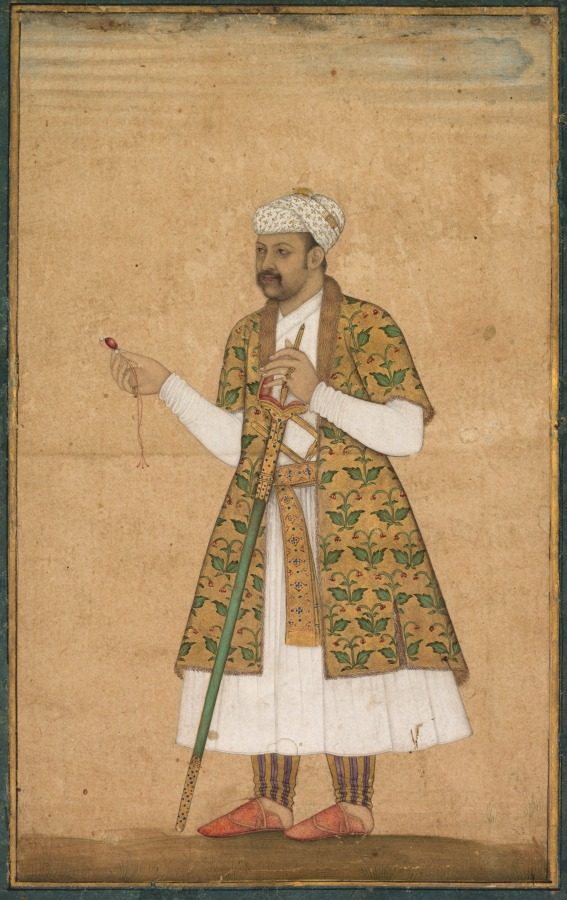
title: A Courtier, Possibly Khan Alam, Holding a Spinel and a Deccan Sword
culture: Mughal India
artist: attributed to Govardhan (Indian, active c.1596–1645)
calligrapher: Abd al-Rahim, the Anbarin-Qalam (Indian, active c. 1590–1630)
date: c. 1605–10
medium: gum tempera, ink, and gold on paper, text on verso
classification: Painting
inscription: Verso: A tahshiyya (marginal addendum) in rhymed prose from the Gulistan (Rose Garden) of Sa‘di (Persian, 1210–1291) and the Nafahat al-Uns (Breaths of Fellowship) of Abd al-Rahman Jami (Persian, 1414–1492), c. 1605, Abd al-Rahim, the Anbarin-Qalam (Indian, active c. 1590–1630), Mughal court; In nast’aliq script: O Lord of the all dominions Praise and thanks to God—may he be honored and glorified!—whose worship brings one closer to him and giving thanks [to him] increases his bounty. [Each breath] that one inhales, prolongs life, and when exhaled a rejuvenation of the soul. Thus each breath contains two blessings, and on each blessing gratitude is due. Who is able, by word or deed, to fulfill the task of paying him due thanks? It is more apt for his slaves to seek at the Divine court pardon for their shortcomings, for what truly is worth his lordship none can render adequately. Persian verses from the Nafahat al-uns quoting a poem by the mystic Sheikh Ruzbihan of Shiraz (Persian, 1128–1209), in nast’aliq script: That which has not been visible to the eye of time; That which has not been audible to the ears of the earth; Has manifested itself in the clay of my being. Come at once and see it in my clay.This page has been written as marginalia to the book Mir’at al-quds [Mirror of Holiness],written by the wretched Abd al-Rahim Anbarin-Qalam, may God forgive his sins.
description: According to Akbar's court historian, the emperor ordered likenesses to be taken of the grandees of his realm. "An immense album was thus formed: those that have passed away have received a new life, and those who are still alive have immortality promised them." Akbar's son and successor, Jahangir (reigned 1605-27), continued the tradition of commissioning works of lifelike portraiture for inclusion in imperial albums. This courtier wears an opulent fur-trimmed, fringed velvet coat over his belted white tunic and striped pants-the typical Mughal dress derived from their roots among the nomadic horse-riding people of Central Asia. The artist has reveled in creating the soft textures of the facial hair, fur and fabrics. He holds a ruby-like gemstone called a spinel, which was prized among the Mughals for its talismanic properties of protection during battle.